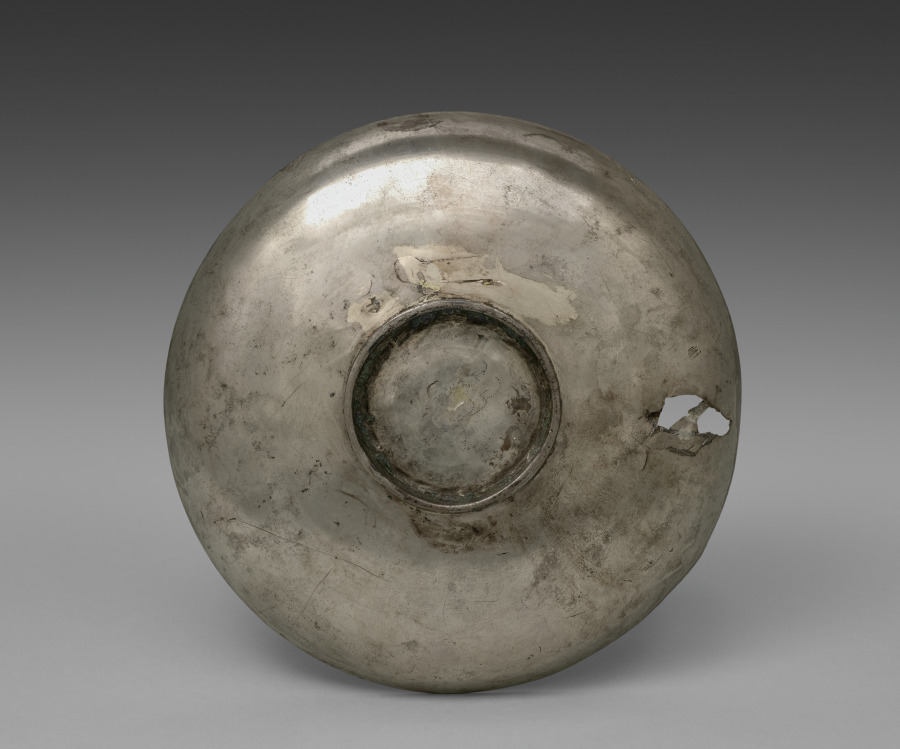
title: Dish with King Hormizd II or Hormizd III Hunting Lions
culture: Iran, Sasanian Empire (224–651 CE)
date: 400–600 CE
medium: silver gilt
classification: Metalwork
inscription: On reverse, inside foot, an inscription in Pahlavi reads according to Dr. Frye, Harvard University: "Gozac, one pound (fifty) one drachms."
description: Lion hunting was a traditional royal sport in ancient Near Eastern cultures and was frequently incorporated into artwork, such as Assyrian (about 912–612 BCE) palace reliefs. Thematically, depictions of the hunt in royal artwork bridge the pre- and post-Islamic worlds. This dish features the Sasanian ruler Hormizd II (reigned 303–309 CE), identifiable by his distinctive crown. The style of the king’s and horse’s equipment suggest that this dish was made long after he died, perhaps as a commemorative work by a much later successor, Hormizd III (reigned 457–459 CE).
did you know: Hormizd II's crown is distinct with its eagle form and topped with the traditional korymbos, a fine, bejeweled fabric that encases the top hair in a globelike fashion.